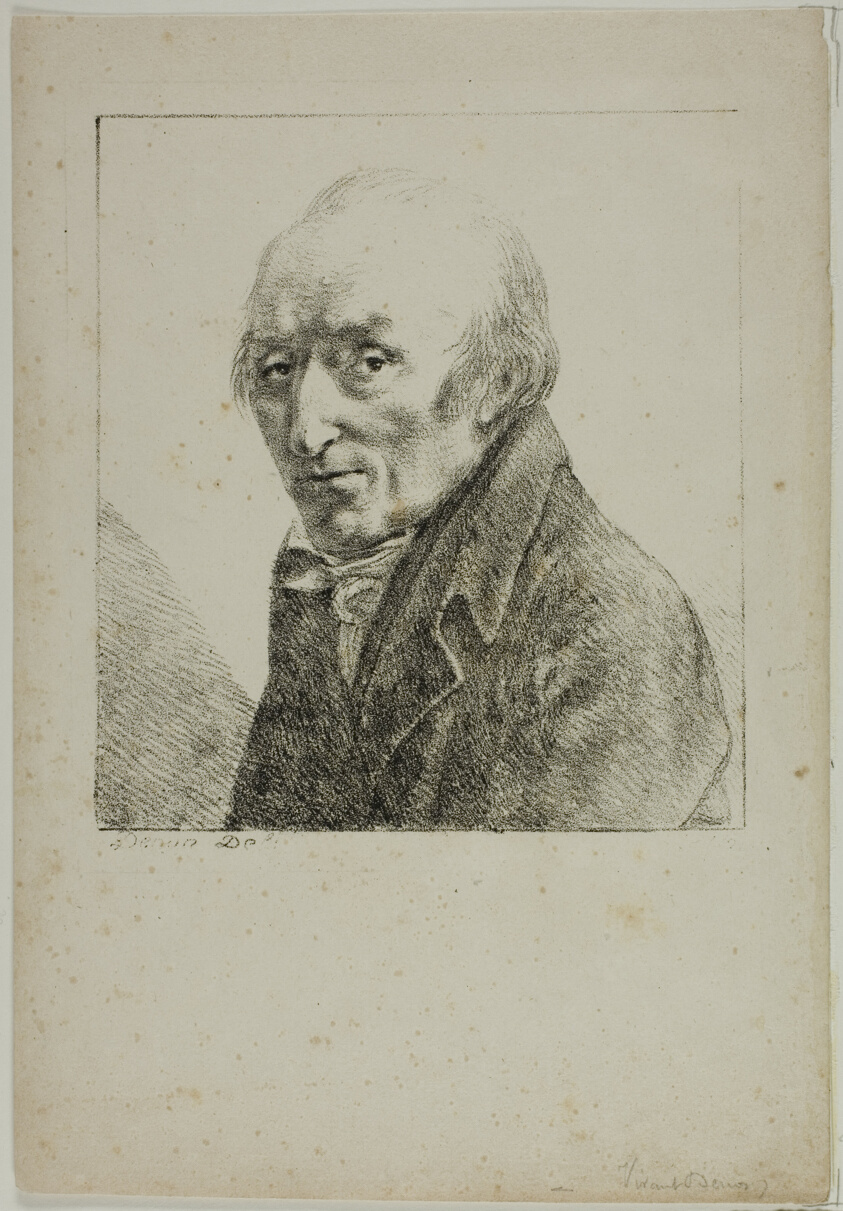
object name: Print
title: Portrait of Monsieur Morice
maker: Dominique-Vivant Denon (French, 1747-1825)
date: 1817–20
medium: Lithograph in black on ivory wove paper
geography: France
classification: lithograph; print; prints and drawing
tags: portraits